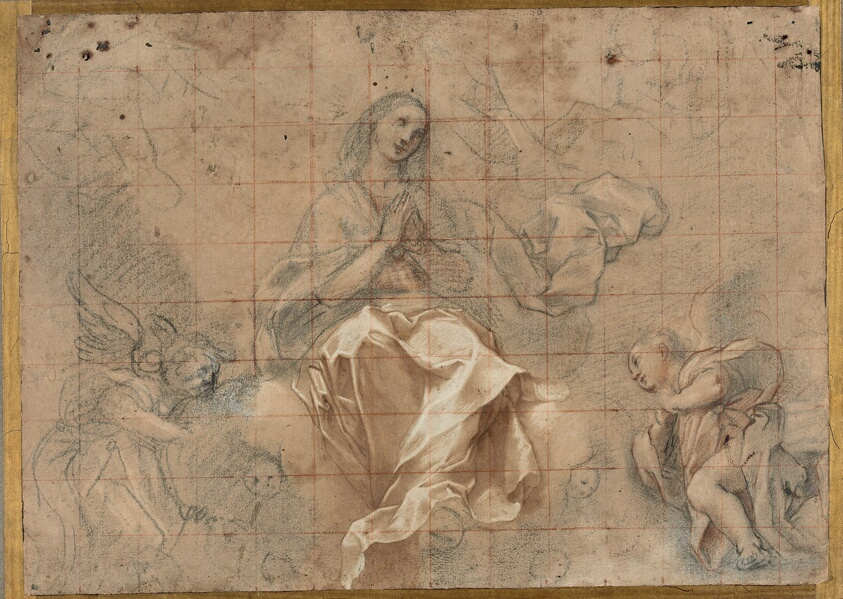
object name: Drawing and Watercolor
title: Study for the "Madonna of the Rosary"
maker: Federico Barocci (Italian, 1528–1612)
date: c. 1589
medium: Black chalk, with brush and brown wash, red chalk, and touches of graphite, heightened with white chalk and white gouache, on tan laid paper, squared in red chalk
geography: Italy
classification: drawing; paper; prints and drawing; chalk